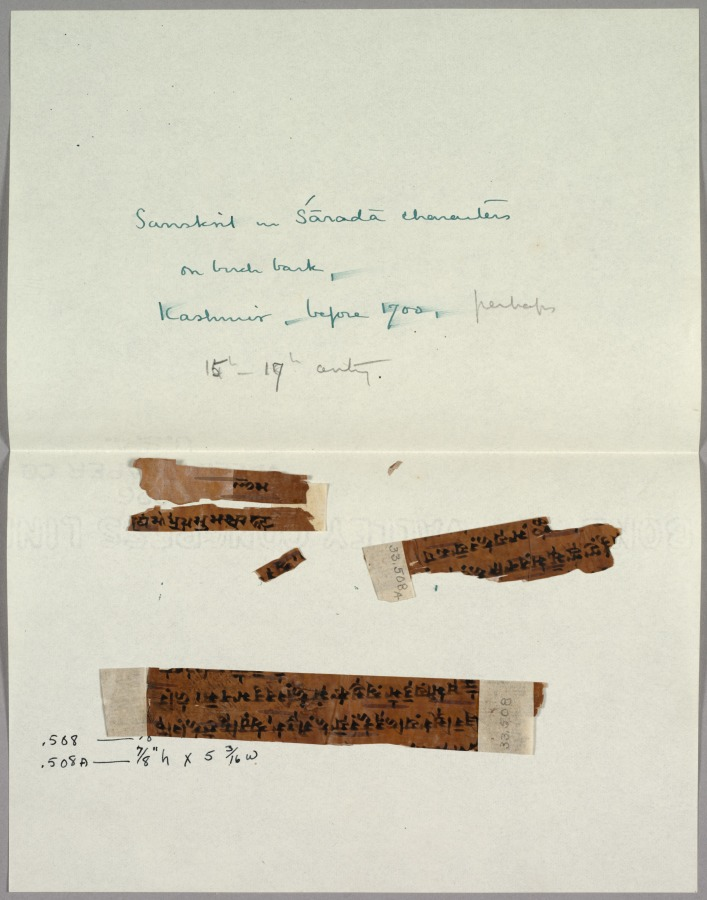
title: Two Fragments of Bark with Sanskrit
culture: India, Kashmir, 17th century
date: before 1700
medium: ink on paper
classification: Manuscript